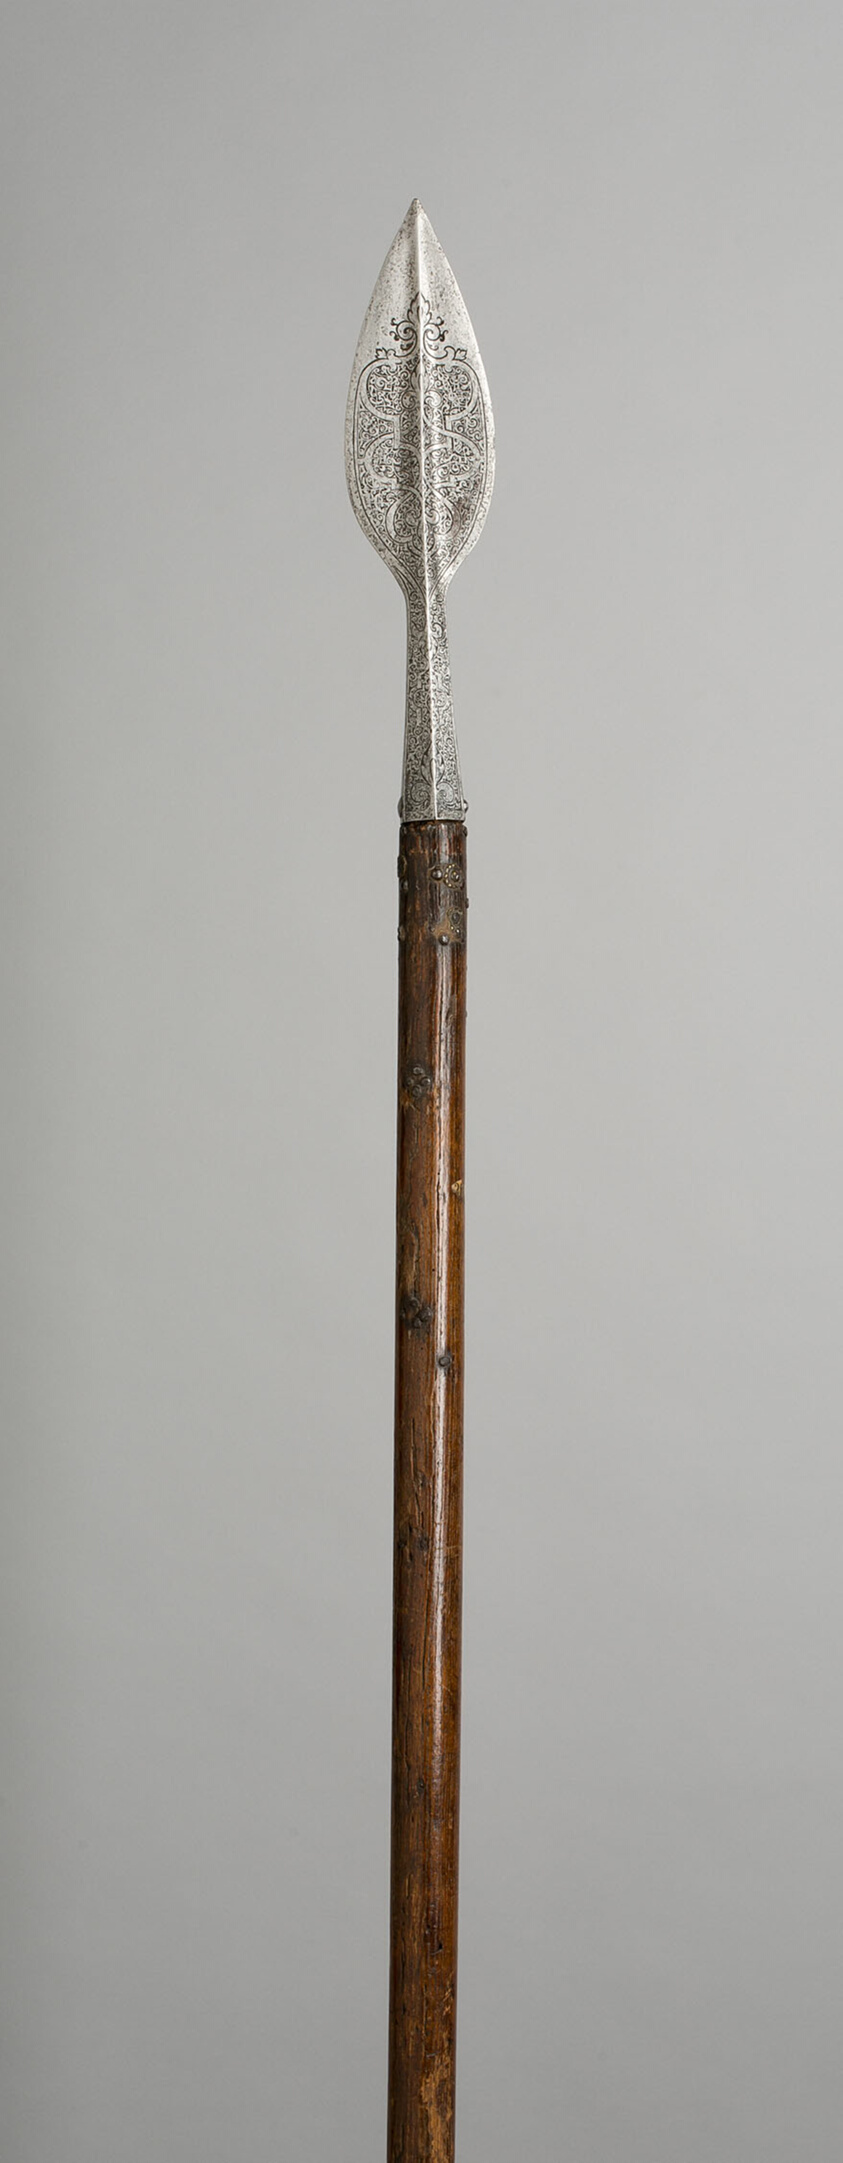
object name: Arms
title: Boar Spear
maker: German, Saxony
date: 1575/1600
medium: Steel, brass, and ash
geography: Saxony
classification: edged weapon-staff; arms; arms and armor